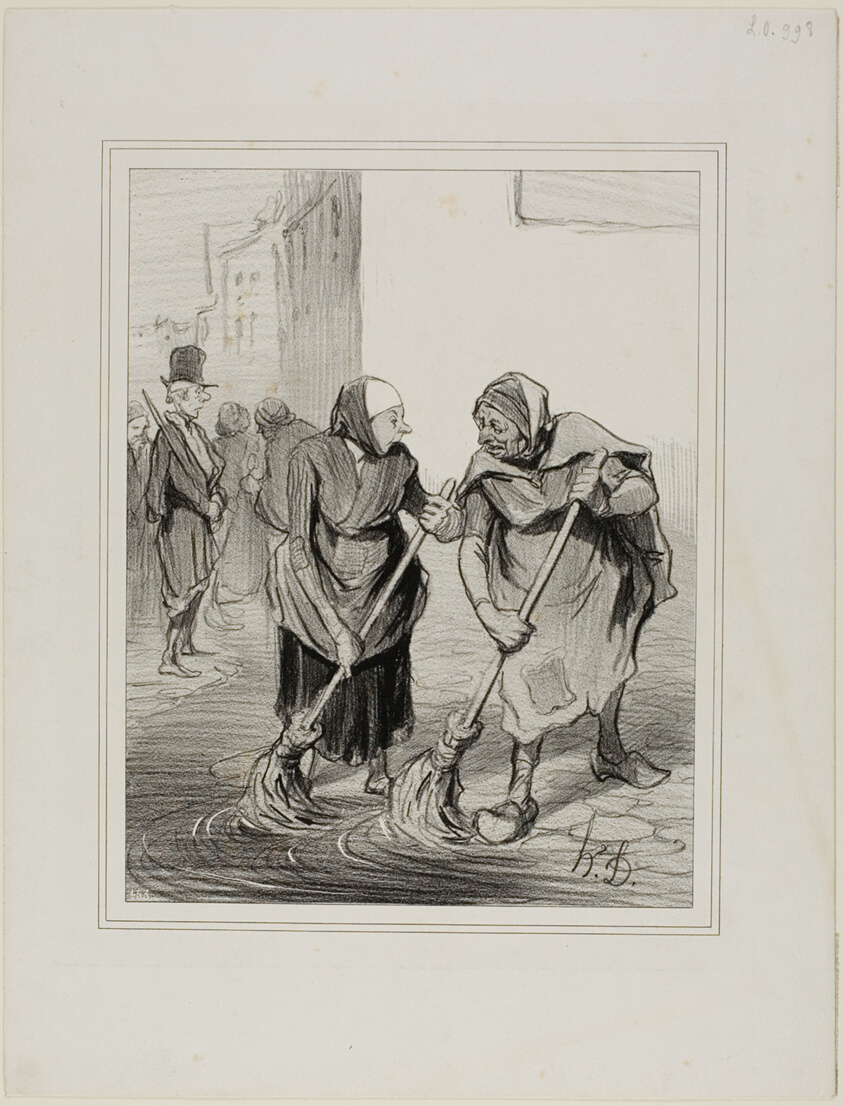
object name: Print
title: “- Say then, Madme. Giboulard … don't you agree that it is not very pleasant for women of our gender, to come down like this everyday, cleaning the gutters of St. Honoré … - That's true, Madame Chaffarou, but we can also praise ourselves of being the only ones to embellish Paris!,” plate 75 from Caricatures Du Jour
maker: Honoré Victorin Daumier; French, 1808-1879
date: 1843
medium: Lithograph in black on white wove paper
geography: France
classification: lithograph; print; prints and drawing